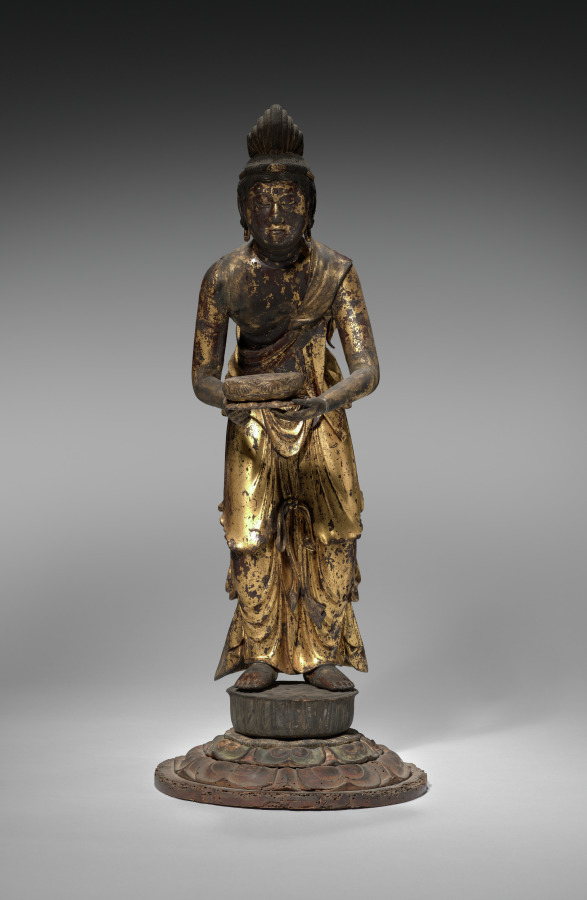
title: Kannon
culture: Japan, Kamakura period (1185–1333)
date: early 1200s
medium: wood with lacquer and gold leaf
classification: Sculpture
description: Kannon, the bodhisattva of compassion, is one of the two bodhisattvas attending Amida, the Buddha of the Western Paradise. The sculpture stands on a lotus pedestal, holding a lotus dais on which the soul of the faithful is received into paradise. The use of gold was prevalent in Buddhist art during this time—it was believed that the yellow light permeated the regions of the Amida—and Amida worship prevailed throughout Japan.